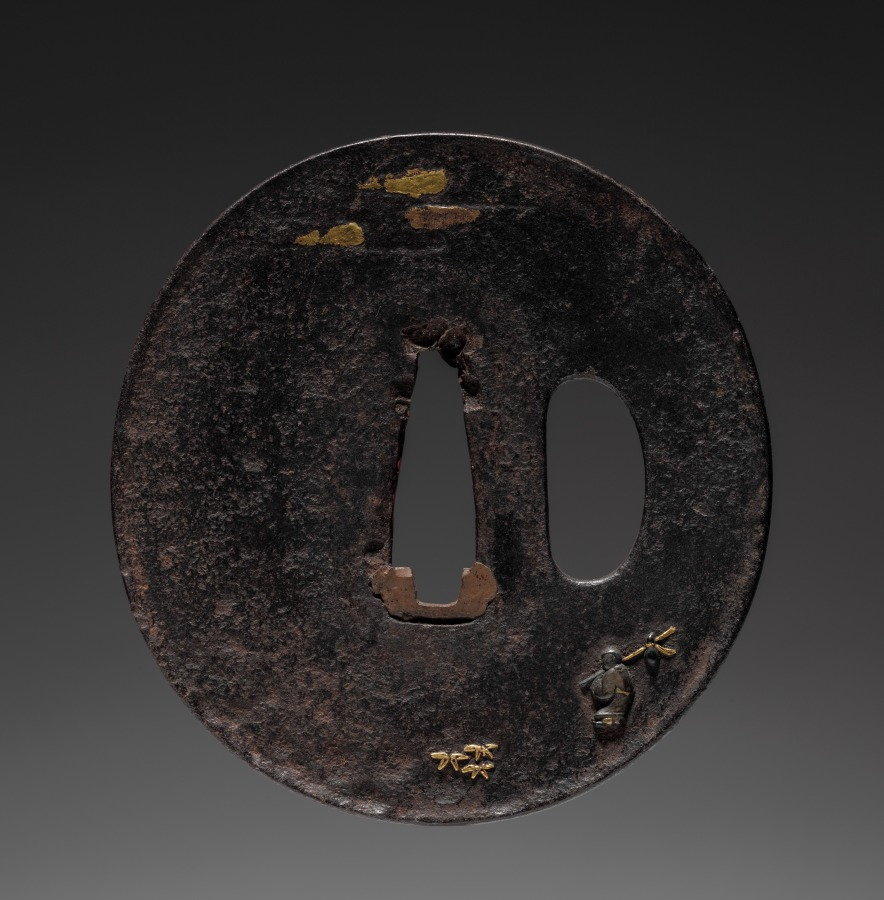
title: Sword Guard (Tsuba) with Traveler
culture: Japan, possibly Edo period (1615-1868)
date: c. 1615–1868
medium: iron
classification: Arms and Armor